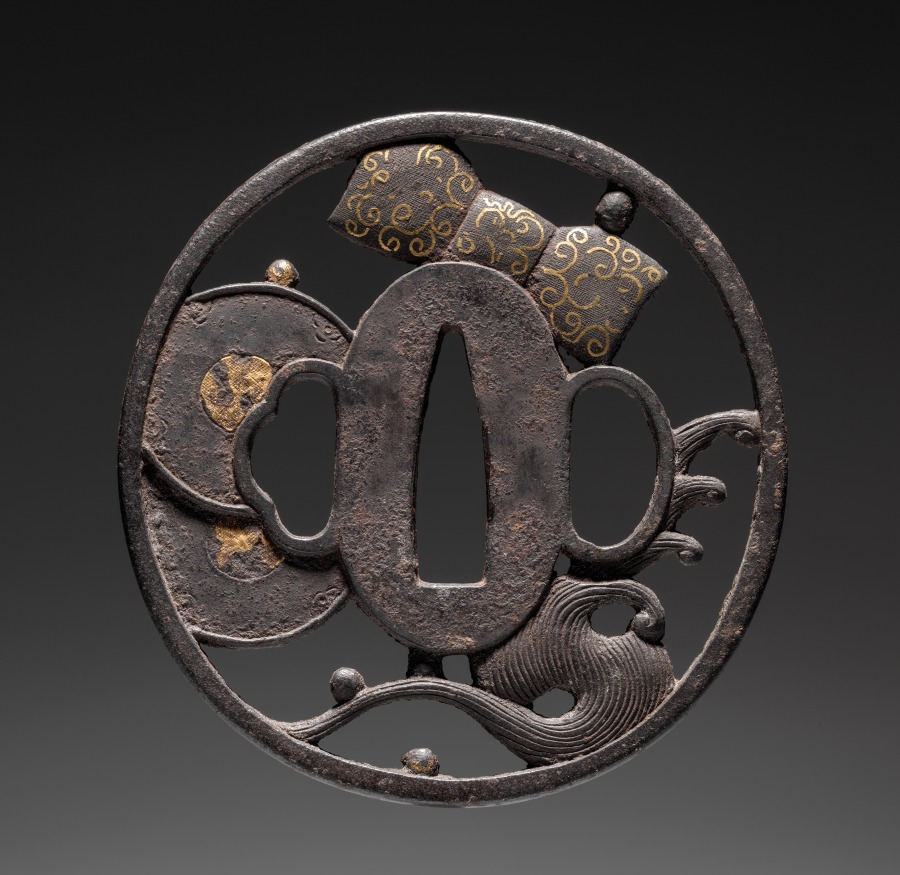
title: Sword Guard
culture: Japan, possibly Edo period (1615-1868)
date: c. 1615–1868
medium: iron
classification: Arms and Armor